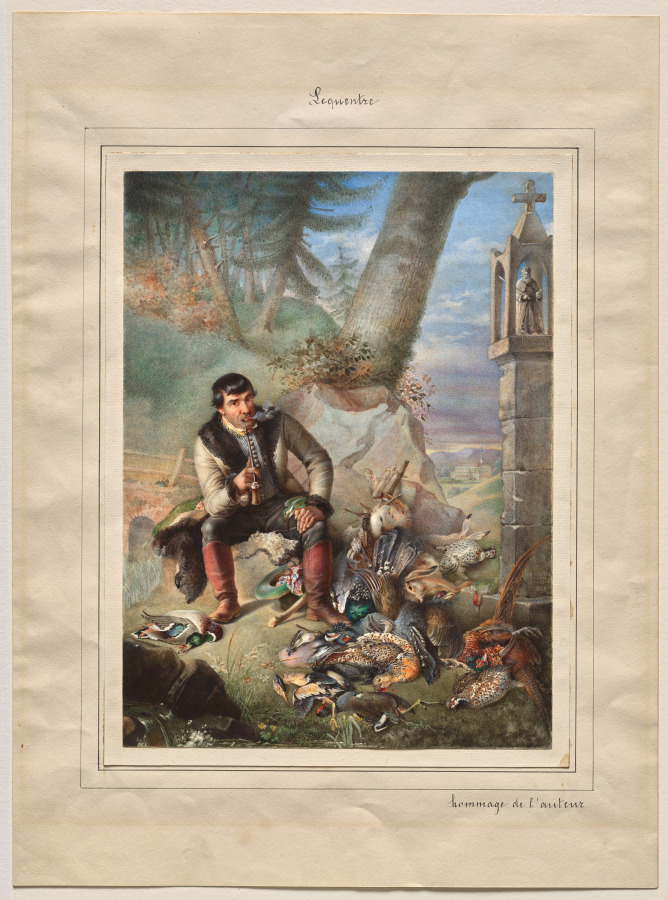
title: Hunstman with Trophies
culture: France, 19th century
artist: Hippolyte Lequeutre (French, 1793–1877)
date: 1800s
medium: watercolor and gouache over graphite, partly varnished, on woven paper, pasted down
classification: Drawing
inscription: The shrine is inscribed beneath the figure "h. heinrich" and is signed above the base "lequentre/Brunsee/1842;" inscribed on the mount at top in black ink, "Lequentre," and at the lower right "hommage de l'auteur"